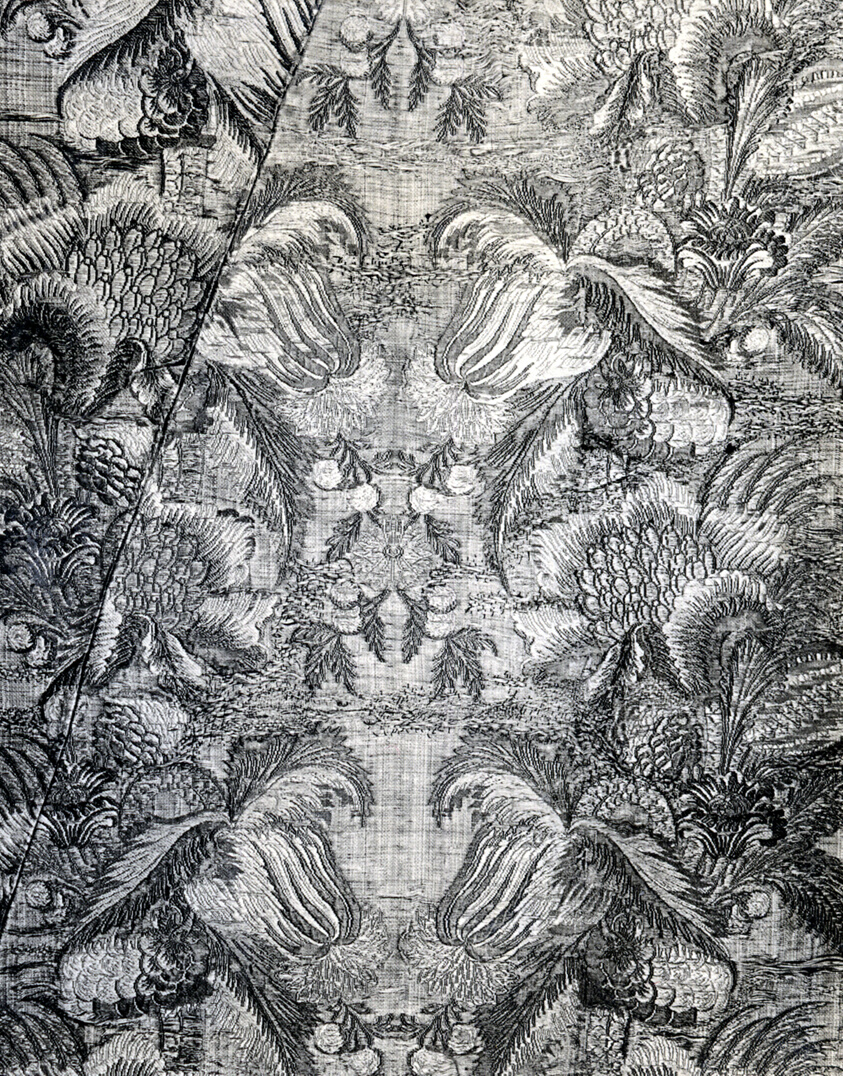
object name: Textile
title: Panel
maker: France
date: 1732/34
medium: Silk and silver-gilt-strips-wound-around-silk-fiber cores warp-float faced 7:1 satin weave of two color complementary ground wefts, with supplementary binding warps tying supplementary brocading wefts and self-patterning ground wefts in twill interlacings;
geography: France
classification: textile; weaving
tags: tulips, flowers, chrysanthemums